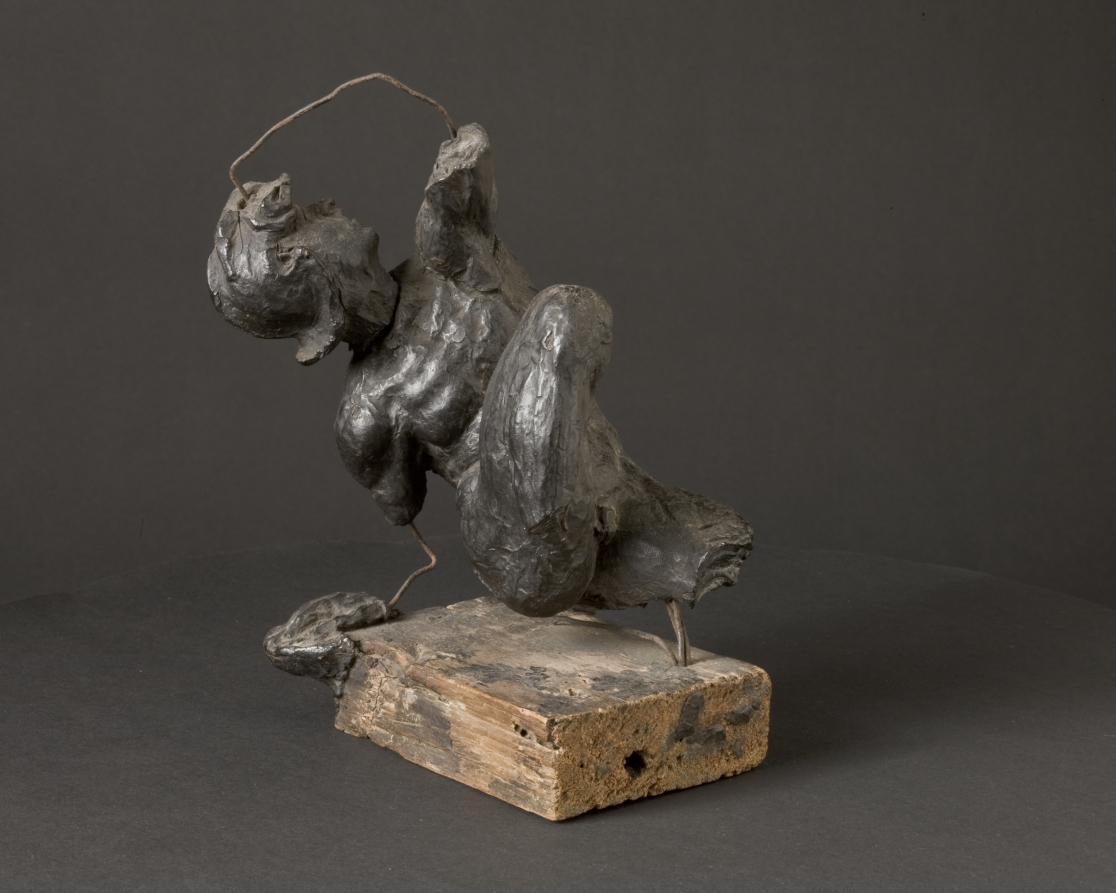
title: Model for a Fallen Warrior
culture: Italy, 16th century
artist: attributed to Giovanni Francesco Rustici (Italian, 1474–1554)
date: c. 1520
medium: wax on a metal armature, mounted on wood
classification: Sculpture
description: Giorgio Vasari (1511–1574), an influential writer and painter, notes in his biography of his contemporary Rustici, that the artist sculpted terracotta battle scenes of groups of horses "with men on their backs or under them." This wax model may be a study for such a group, showing a contorted, helmeted warrior bracing himself after falling to the ground. The figures for these projects were most likely inspired by those in Leonardo's monumental wall painting depicting the Battle of Anghiari for the Hall of the Five Hundred in the Palazzo Vecchio, Florence. Although the fresco was never completed, its pictorial scheme was well known. Rustici later collaborated with Leonardo, and was undoubtedly aware of the major commission and its dynamic portrayal of war.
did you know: Sixteenth-century sculptors often sketched their ideas in three dimensions using wax, clay, or stucco.